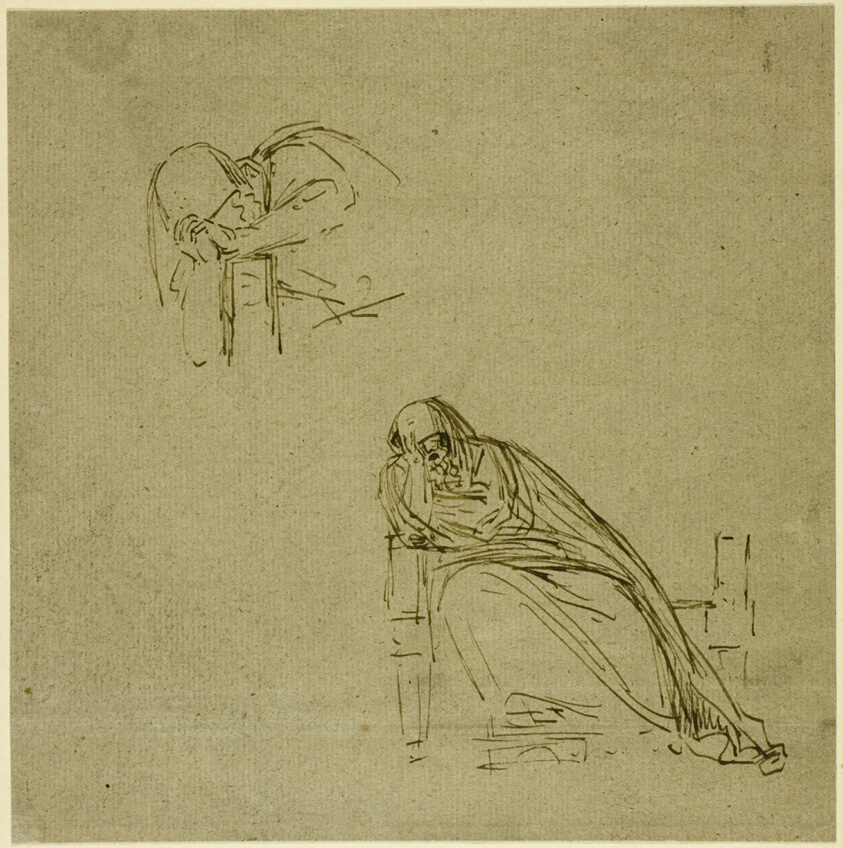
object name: Drawing and Watercolor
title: Two Sketches of a Weeping Woman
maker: Benjamin West (American, 1738-1820)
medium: Pen and brown ink, on gray laid paper, perimeter mounted to cream wove card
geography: United States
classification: pen and ink drawings; drawings (visual works); prints and drawing